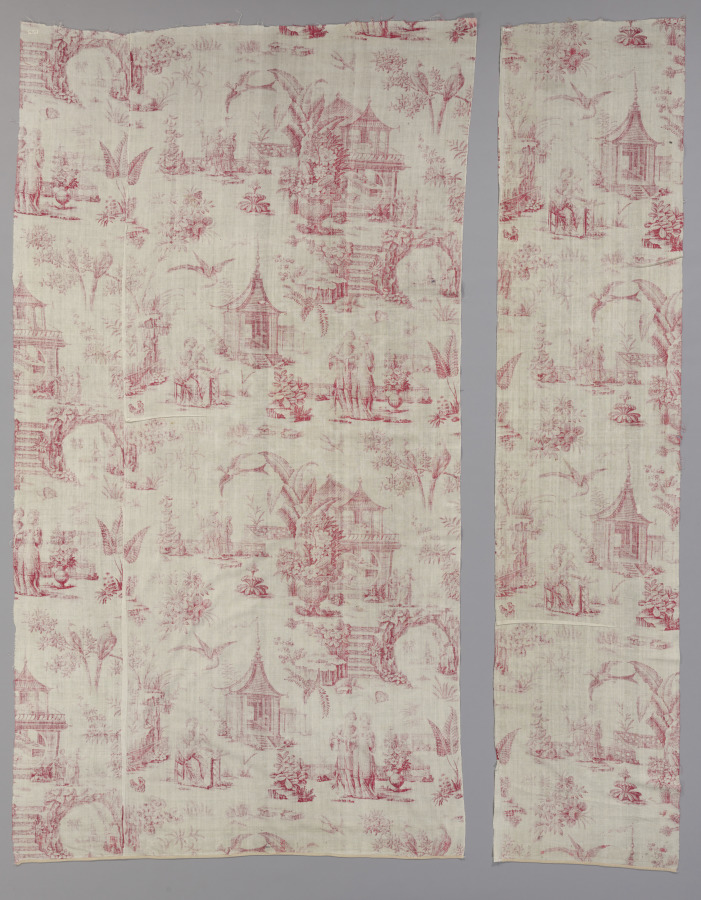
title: Copperplate-Printed Cotton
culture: England, Chambers, 18th century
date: 1700s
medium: copperplate printed cotton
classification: Textile